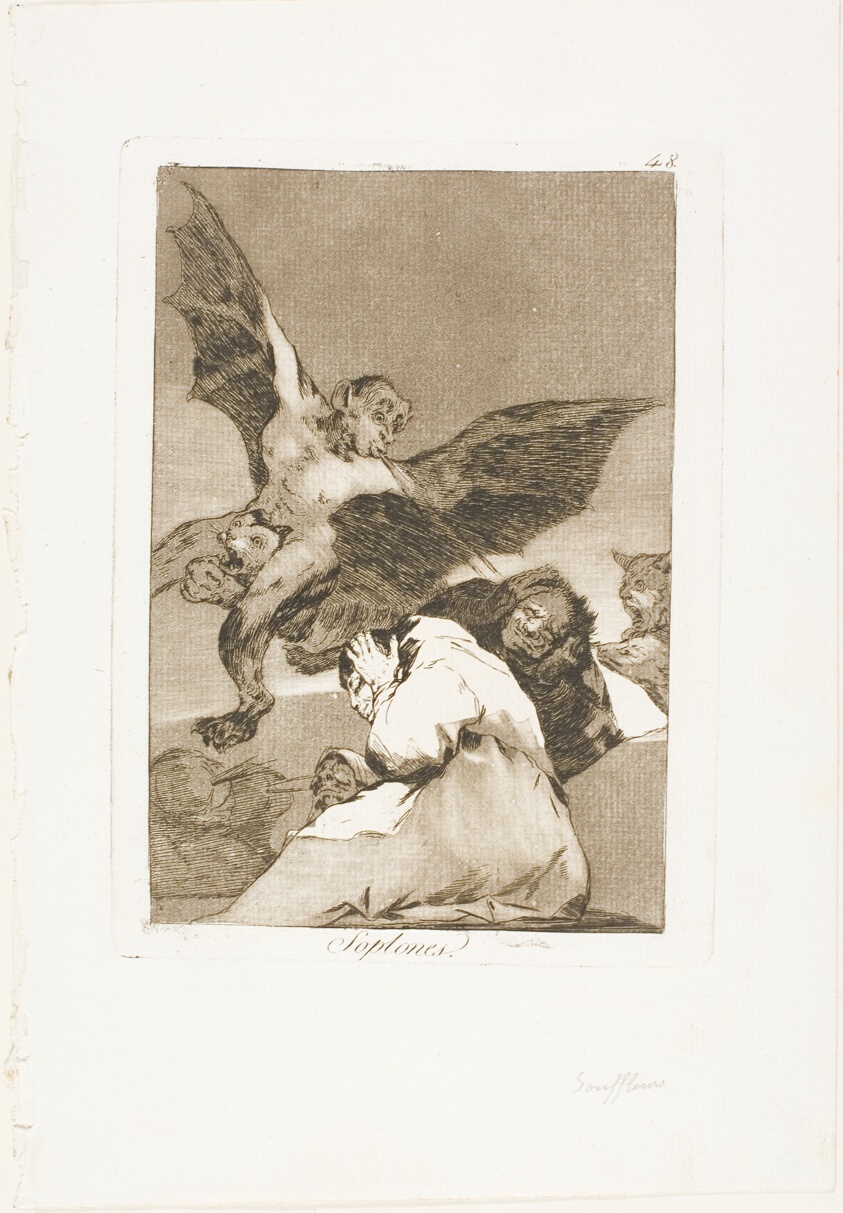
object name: Print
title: Tale-Bearers - Blasts of Wind, plate 48 from Los Caprichos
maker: Francisco José de Goya y Lucientes (Spanish, 1746-1828)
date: 1797/99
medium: Etching and aquatint on ivory laid paper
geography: Spain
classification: etching; print; prints and drawing